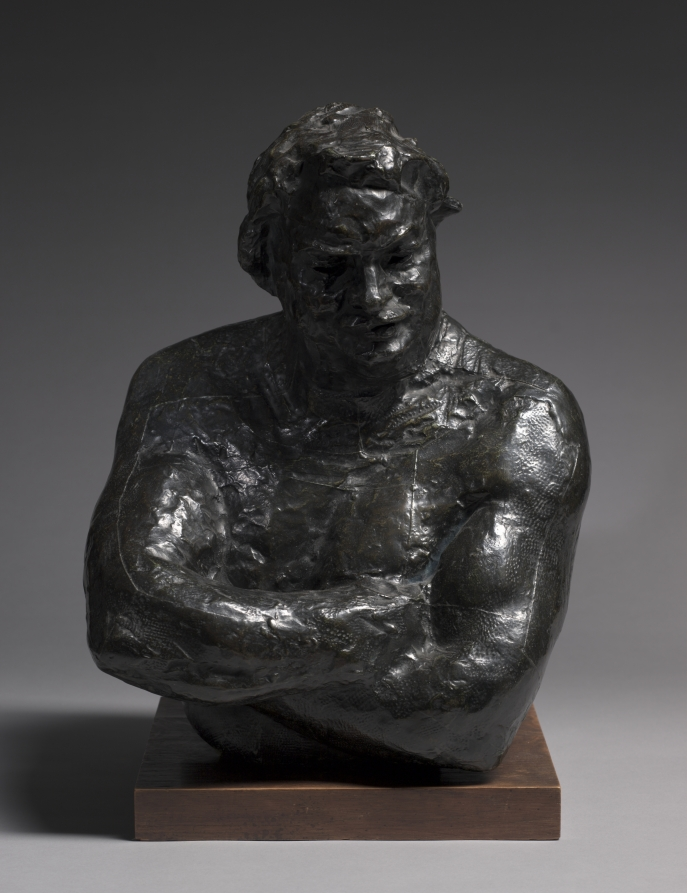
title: Study of Honoré de Balzac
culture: France, 19th century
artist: Auguste Rodin (French, 1840–1917)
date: 1891–1892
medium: bronze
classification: Sculpture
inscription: Signed on side, under left arm: "A. Rodin"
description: In 1891 Rodin was commissioned to create a monument honoring the celebrated French writer Honoré de Balzac. The figure evolved through multiple stages over a seven-year period as Rodin explored different methods of conveying the author’s genius and personality. This bust is a study for the first version, in which the full figure stands upright with legs apart, arms crossed over his corpulent belly. Rodin’s unglamorous portrayal of a national hero shocked the public accustomed to idealized figures in public monuments. The final design was even more intensely criticized because Rodin reduced the body to a powerful, abstract mass intended to convey the symbolic essence of the writer’s creative vitality.